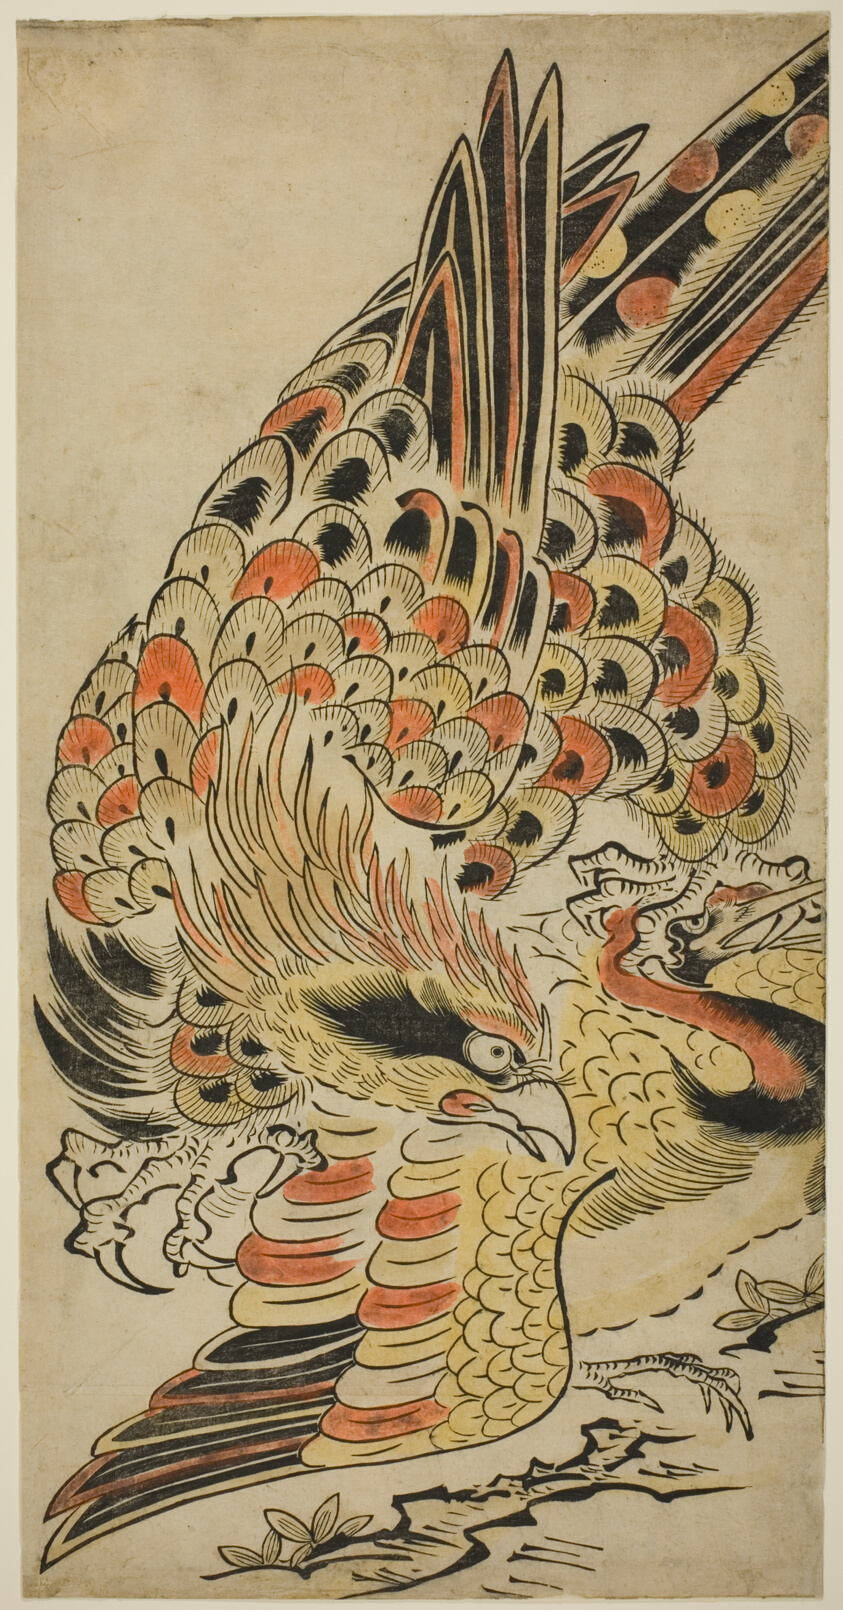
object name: Print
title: A Hawk Capturing a Crane in Flight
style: Japanese (culture or style)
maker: Attributed to Torii Kiyomasu I; Japanese, active c. 1704–18 (?)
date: c. 1715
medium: Hand-colored woodblock print; vertical o-oban, tan-e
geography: Japan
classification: woodblock print; print; asian art